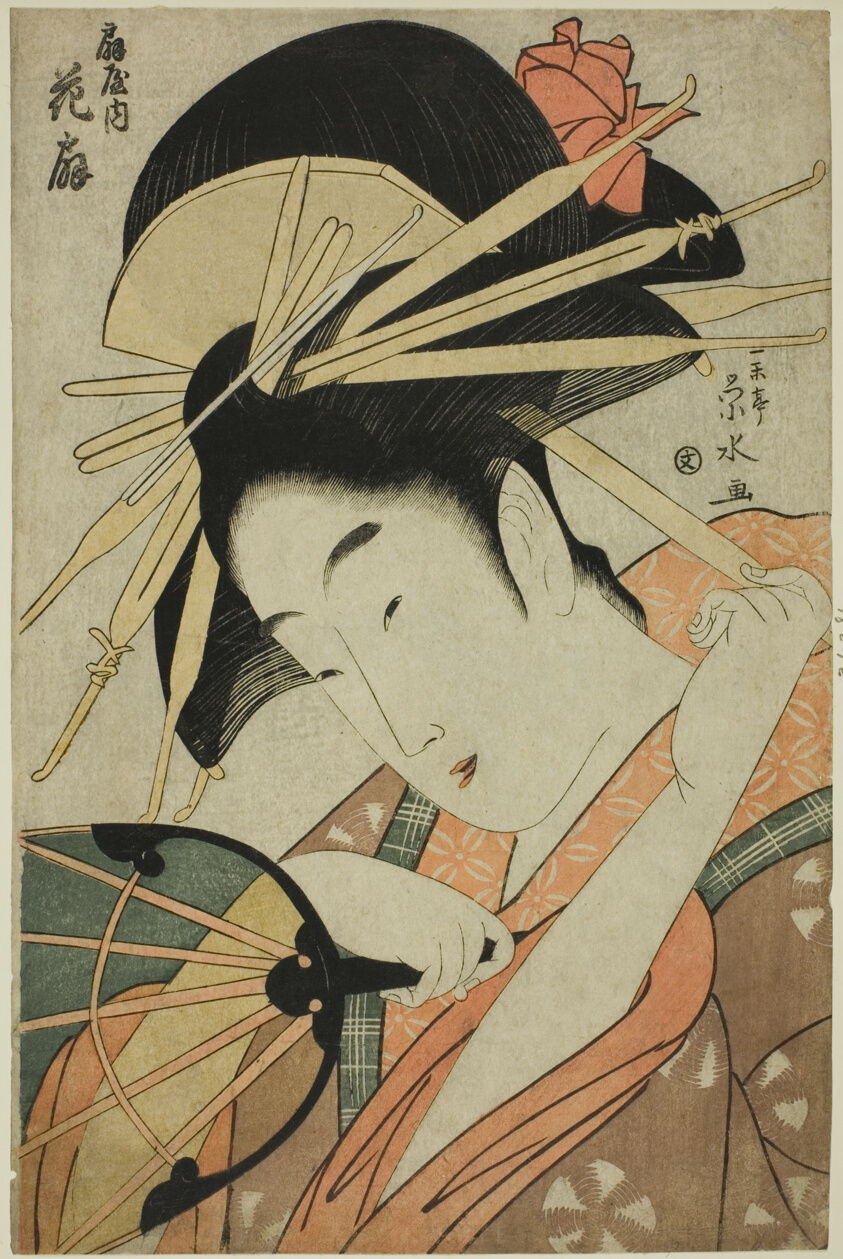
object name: Print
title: The Courtesan Hanaogi of the Ogiya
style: Japanese (culture or style)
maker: Ichirakutei Eisui (Japanese, active 1790-1823)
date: c. 1798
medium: Color woodblock print; oban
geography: Japan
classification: woodblock print; print; asian art